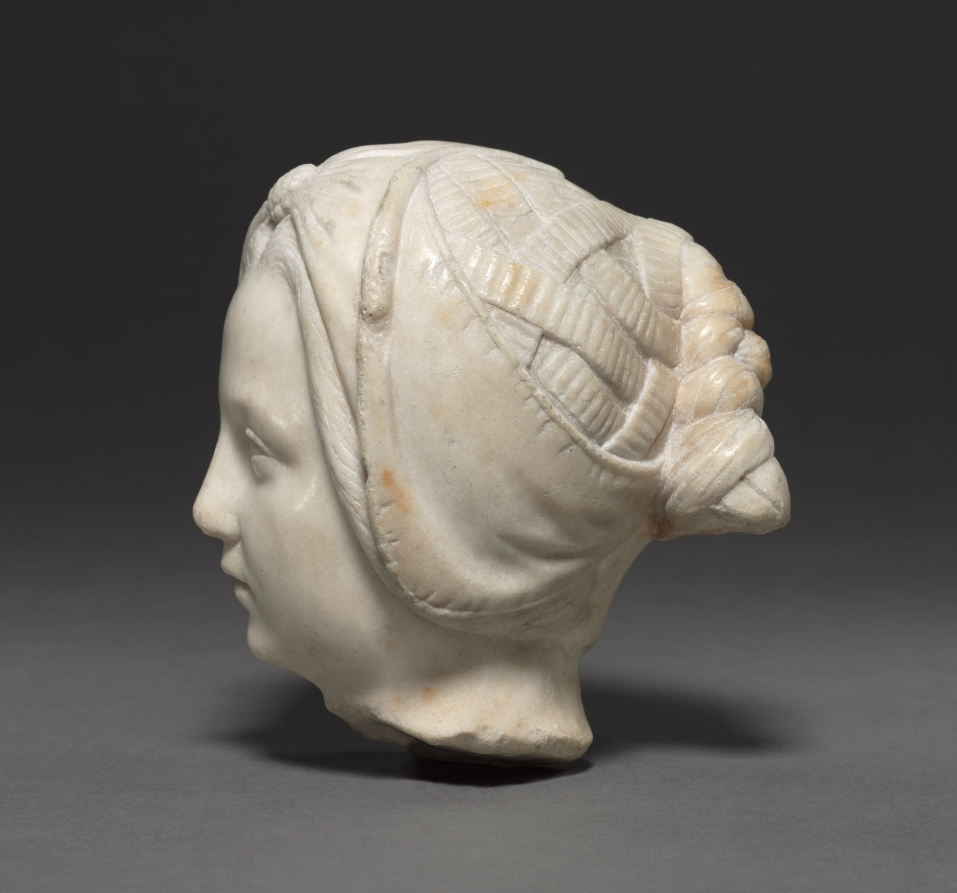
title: Head of a Woman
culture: France, 15th century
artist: circle of Michel Colombe (French, c. 1430–c. 1513)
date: c. 1500–1525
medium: marble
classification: Sculpture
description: The original context and function of these two marble heads are unknown. They are presumed to have been part of a relief sculpture from a château, perhaps in the Loire region, or else from a tomb sculpture. Their style is reminiscent of sculptures produced by Michel Colombe, a prominent sculptor active in the Loire Valley in the service of aristocratic and royal patrons, and may have been carved by a close follower or member of his workshop.